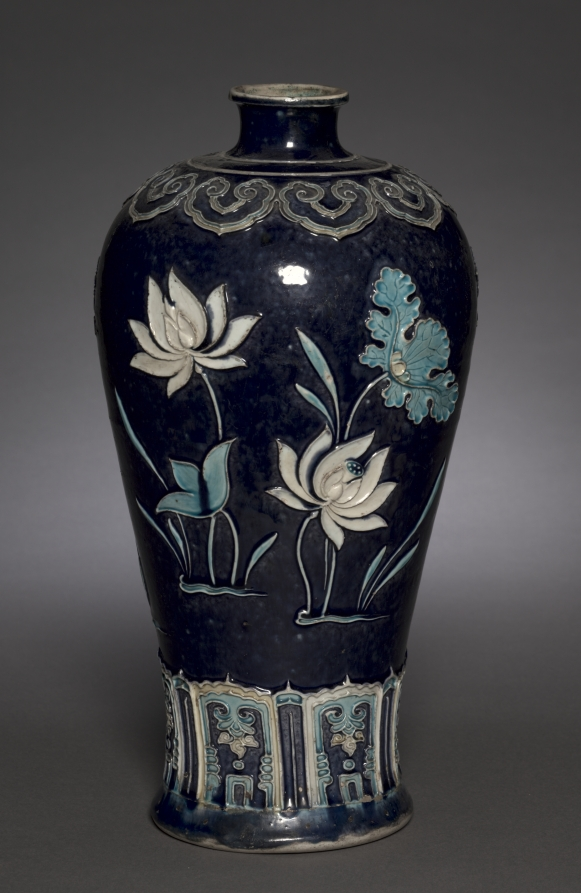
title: Prunus Vase (Meiping) with Blossoming Lotus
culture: China, Jiangxi Province, Jingdezhen kilns, Ming dynasty (1368–1644)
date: late 1400s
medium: Porcelain with polychrome glazes, Fahua ware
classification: Ceramic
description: According to 11th-century poet Zhou Dunyi, “all people like peonies, but I alone like the lotus because it emerges from the mud unstained.” The lotus is a symbol of purity and popular among Chinese literati and in Buddhism. This vase shows lotus flowers rising from the water’s surface depicted in elegant yet simple ripples. Made in a kiln at Jingdezhen in southern China, this vase is an example of the fahua technique—decoration with raised outlines produced by squeezing clay from a tube onto the vase’s surface. Colors are applied to fill the outlines before firing.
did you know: The shoulders of the vase are decorated with ruyi-shaped clouds.